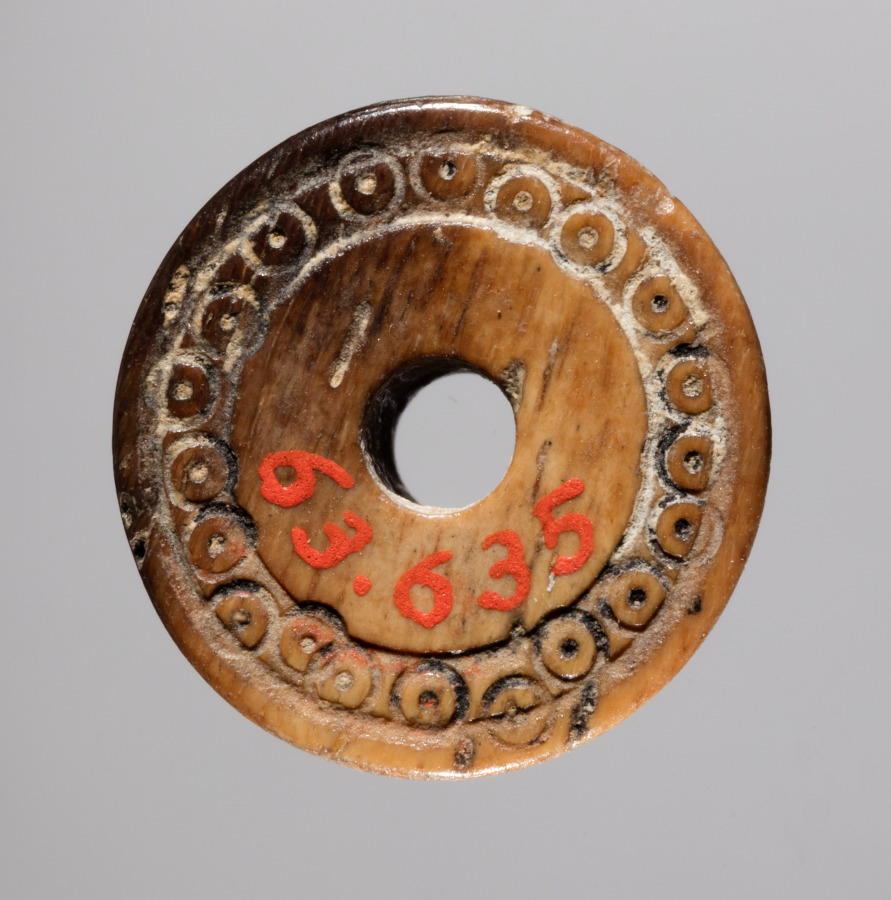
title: Spindle Whorl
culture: Iran, early Islamic period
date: 700s - 900s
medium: bone, incised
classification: Spindle Whorl